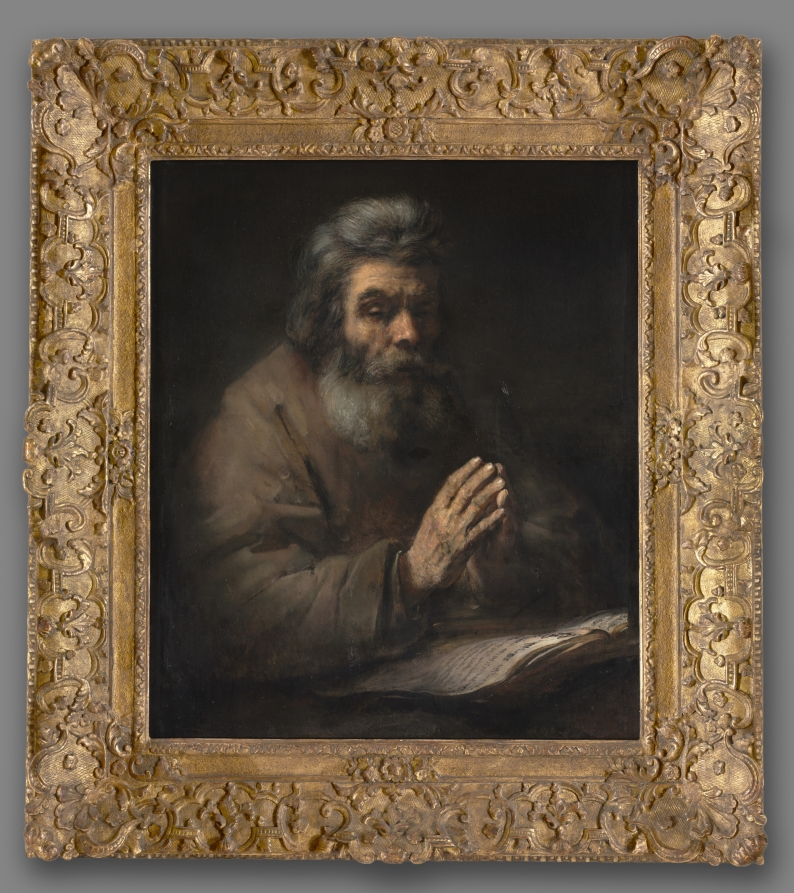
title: An Elderly Man in Prayer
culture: Netherlands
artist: follower of Rembrandt van Rijn (Dutch, 1606–1669)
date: 1660s or later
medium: oil on canvas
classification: Painting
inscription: Signed and dated at middle-right: "Rembrand[t]/ f.166[1]" (Last letter of name and last digit of date are no longer visible).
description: Toward the end of his life, Rembrandt explored religious themes from an intimate perspective, producing a number of works for a possible Apostle series. The personal religiosity of An Elderly Man in Prayer, formerly attributed to Rembrandt, bears resemblance to such late works. Seated with eyes nearly closed and hands clasped in prayer over a large book, the figure appears still and introspective. While the dramatic lighting and dark color palette are reminiscent of Rembrandt's late works, this painting, formerly attributed to the artist, has since been assigned to a follower or a later eighteenth-century imitator of Rembrandt's style for reasons associated with the broad, flat brushwork of the garment, the poor handling of shadow on the hands, and the uniform treatment of the hair.